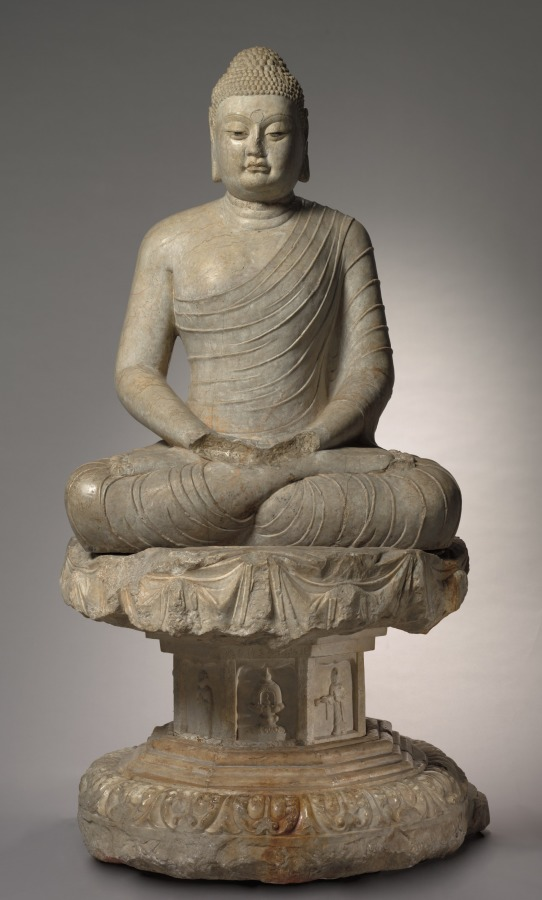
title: Fang Xuanling Pedestal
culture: China, Tang dynasty (618-907)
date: 647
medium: marble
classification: Sculpture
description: This double lotus pedestal exhibits the rich, ornate style of early Tang sculpture. It was commissioned by the Duke of Liang, Fang Xuanling (578–648), for the blessing of his second son and daughter-in-law, the Tang imperial princess of Gaoyang. The iconography and inscription suggest that it originally went with a statue, now missing, of Shakyamuni, the historical Buddha, instead of Amitayus. Today the pedestal is topped with Amitayus, the Buddha of Infinite Life, seated in meditation. Although the pedestal was not made with the statue, the combination is faithful to the original artistic conception.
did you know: In front, the top layer of the pedestal has an abstract curvilinear motif suggesting drapery; the rear is carved with a flower-and-leaf motif.